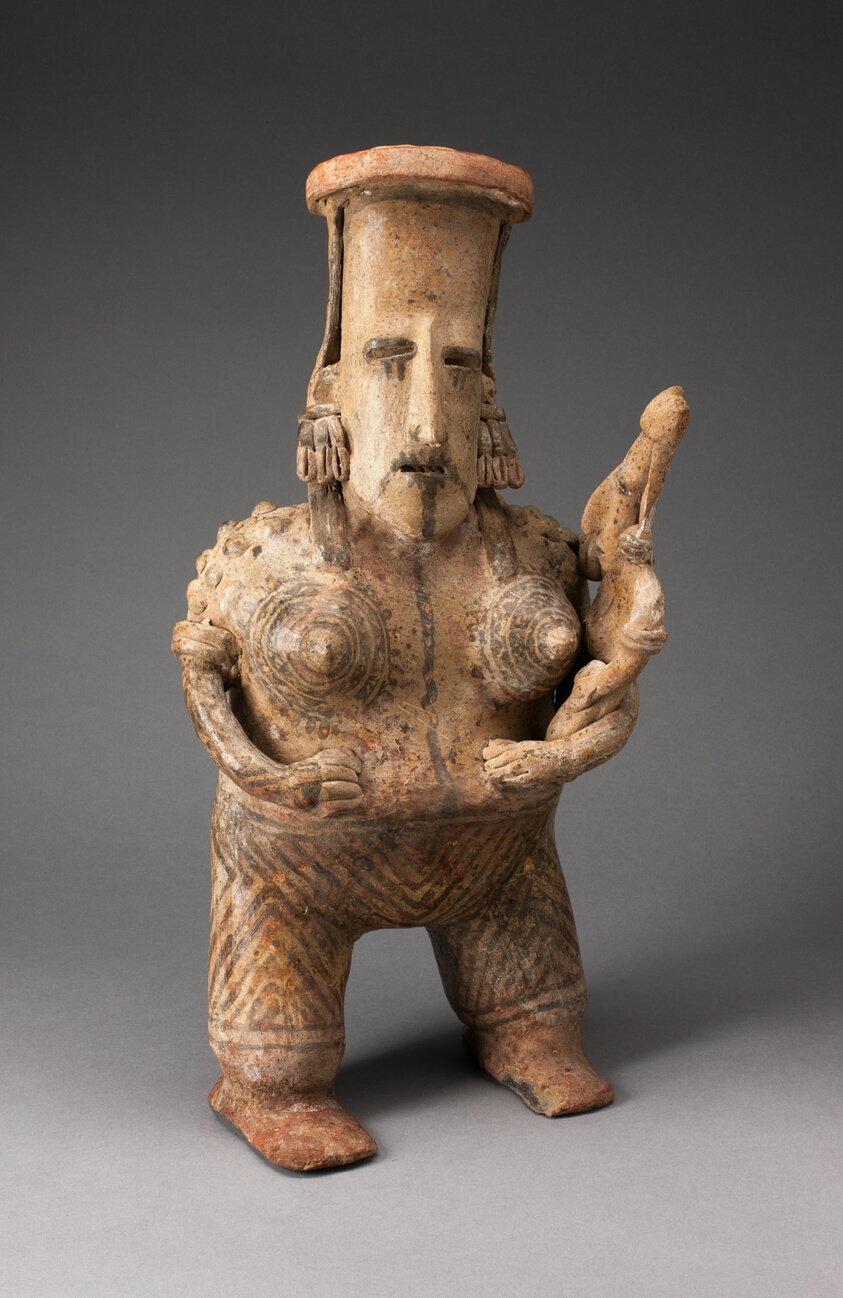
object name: Sculpture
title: Standing Figure of a Mother and Child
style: jalisco, mesoamerican, Pre-Columbian, americas, Arts of the Americas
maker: Jalisco, Ameca-Etzatlán; Jalisco, Mexico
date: 100 BCE–250 CE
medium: Ceramic and pigment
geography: Jalisco state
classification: earthenware; art of the americas; ceramics; sculpture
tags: mothers, children, babies, people